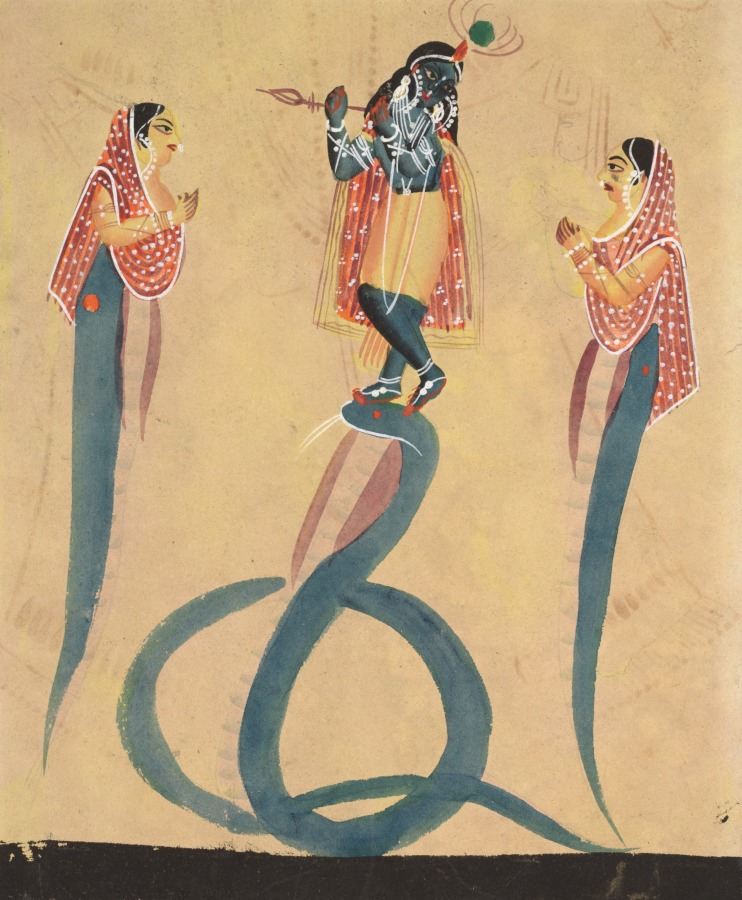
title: Krishna quells the serpent Kaliya (verso), from a Kalighat album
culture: Eastern India, Bengal, Kolkata, Kalighat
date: c. 1890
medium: Gum tempera, graphite, and ink on paper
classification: Painting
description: The serpent Kaliya was poisoning the water of the Yamuna River near the residence of the cowherding community, where Krishna spent his youth. The animals were dying of the toxins. Krishna wrestled the mighty serpent then emerged from the water to dance on his head. Pleading with Krishna to set him free, Kaliya’s wives are shown like mermaids.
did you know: Kaliya is one of the few foes whom Krishna did not kill, but permitted him to relocate to an island in the ocean.